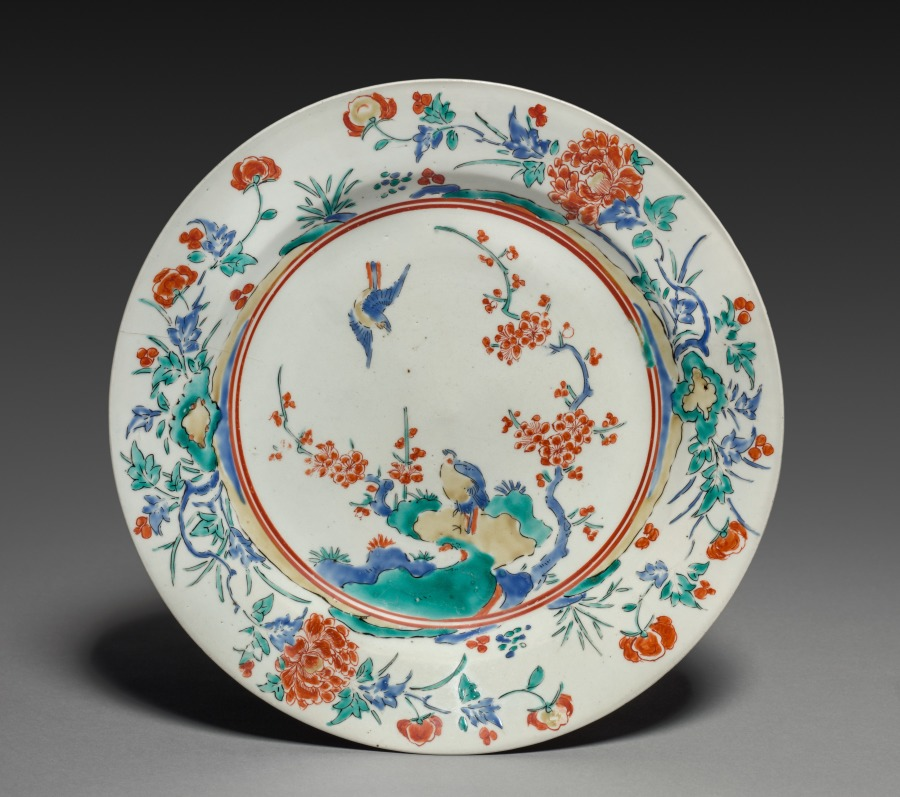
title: Dish with Birds and Flowers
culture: Japan, Edo period (1615–1868)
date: late 1600s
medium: porcelain with overglaze color enamel (Hizen ware, Kakiemon type)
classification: Ceramic